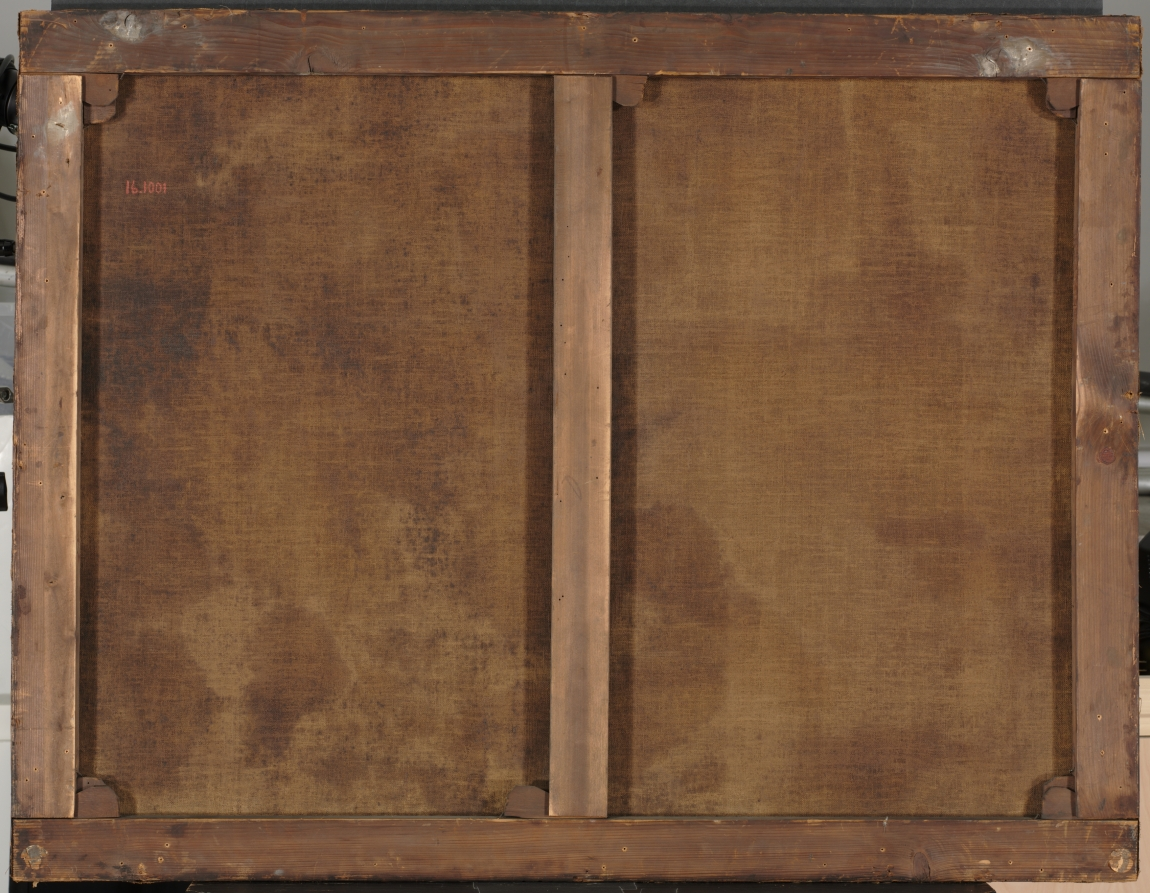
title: Hare, Spoonbill, and Fish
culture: Italy, possibly Genoa, 17th century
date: mid-1600s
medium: oil on canvas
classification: Painting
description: This striking painting of fish and game has yet to be attributed to a specific artist. Art historians have considered Dutch, Spanish, or Italian artists as possibilities, including the Dutch still-life and animal specialist Frans Snyders and the Spanish artist Alejandro de Loarte. But both have been rejected on stylistic grounds. An Italian artist is more plausible; the vaguely rendered, reddish background and the fluid handling of paint, especially in the portrayal of the fish, are characteristic of an Italian hand. The composition, which emphasizes the space between the creatures with strong highlights and deep shadows, also points to an Italian artist, possibly from a Northern Italian city such as Genoa.